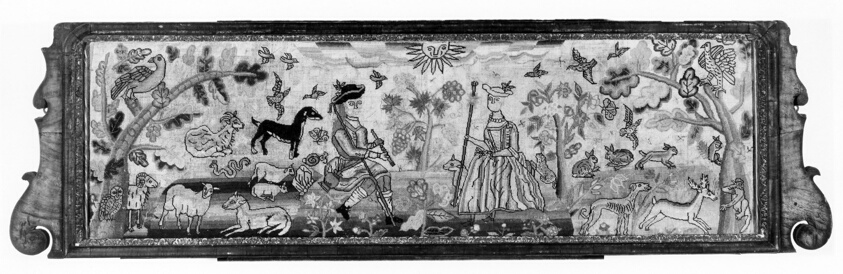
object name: Textile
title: Panel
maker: England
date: 1701/25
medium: Linen, plain weave; embroidered with silk and wool in tent stitches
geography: England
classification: textile; needlework (visual works)